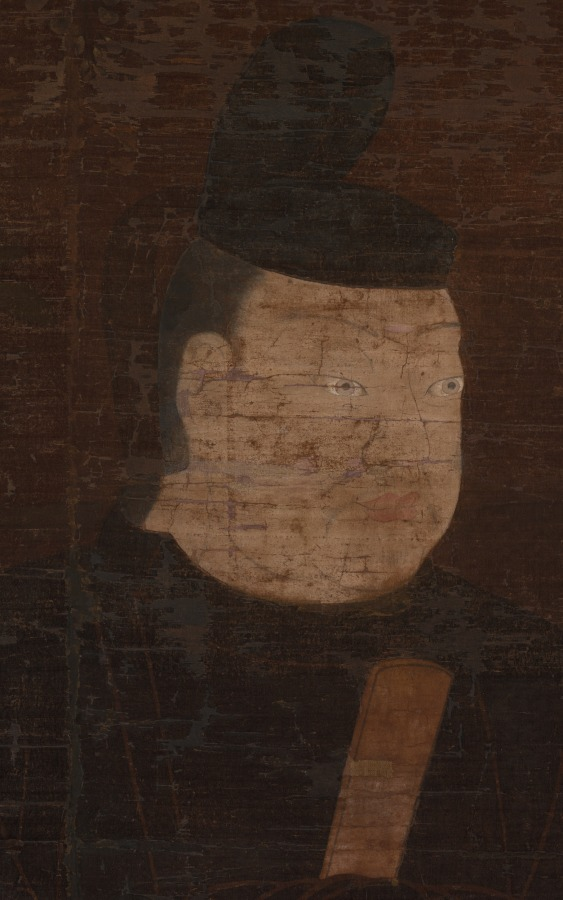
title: Fujiwara no Muchimaro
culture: Japan, Kamakura period (1185–1333)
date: 1200s or 1300s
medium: Hanging scroll; ink, color, gold, and cut gold on silk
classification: Painting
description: This portrait of Fujiwara no Muchimaro (680–737), a grandson of Fujiwara no Kamatari (614–669), includes an image of Buddha Dainichi Nyorai above his head. By situating the image of Dainichi there, this painting would seem to assert that Muchimaro is an avatar of Dainichi. In the same way that kami could be identified with Buddhist counterparts, powerful humans could also be seen as manifestations of Buddhist deities. A similar painting is at Eizanji in Nara, of which Muchimaro is known as the founder. It was once a branch temple of Kōfukuji, the Fujiwara family temple.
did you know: The boughs of wisteria appearing in the background symbolize the figure's status as a Fujiwara family member.